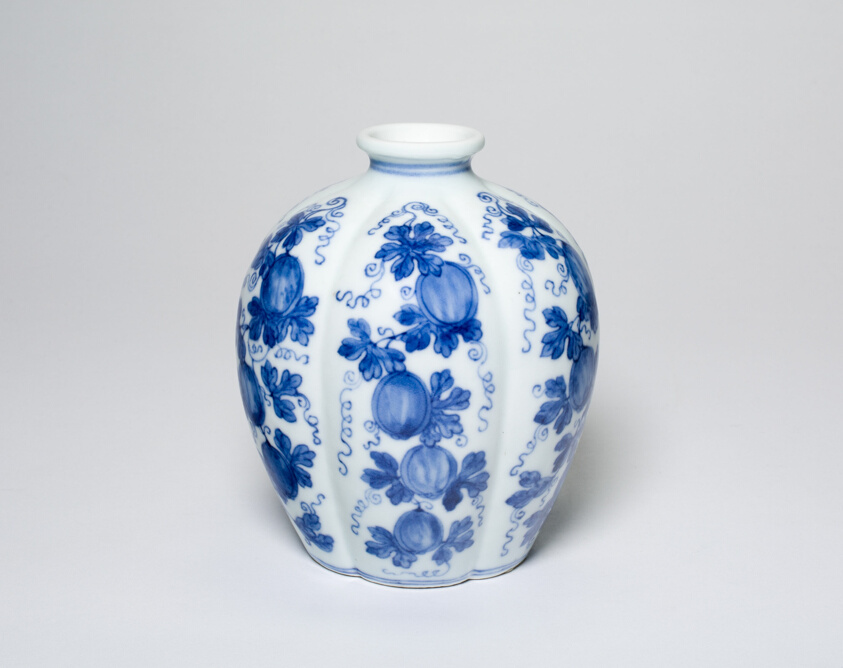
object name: Vessel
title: Lobed Jar with Melons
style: Chinese (culture or style)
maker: China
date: Qing dynasty (1644–1911), Yongzheng reign mark and period (1723–1735)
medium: Porcelain painted in underglaze blue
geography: China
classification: porcelain; asian art; ceramics; vessel